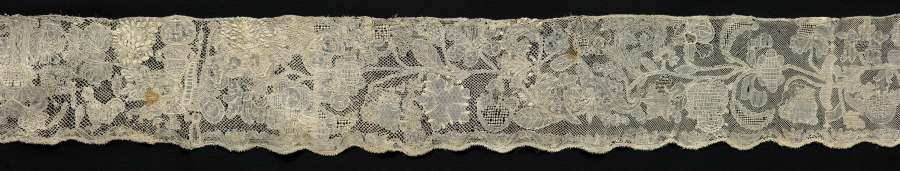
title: Flounce for Alb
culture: Unassigned, 1700s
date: 1700s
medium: Linen: needle lace (drawnwork) and embroidery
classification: Lace